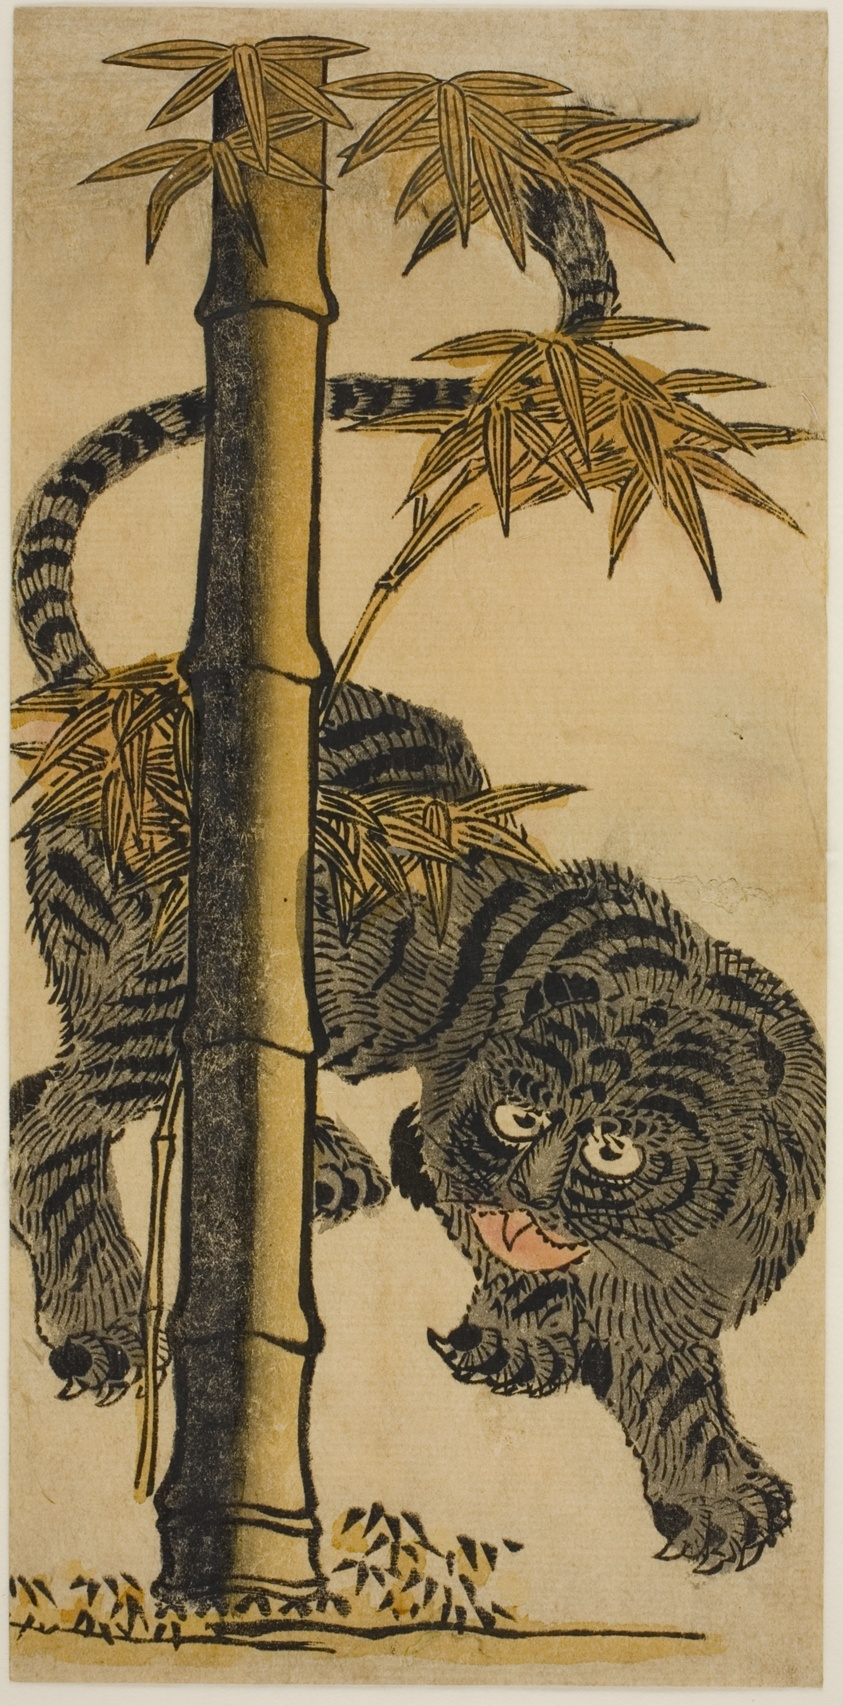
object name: Print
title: Bamboo and Tiger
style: Japanese (culture or style)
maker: Attributed to Nishimura Shigenaga; Japanese, 1697 (?)-1756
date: c. 1725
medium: Hand-colored woodblock print; hosoban, urishi-e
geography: Japan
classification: woodblock print; print; asian art